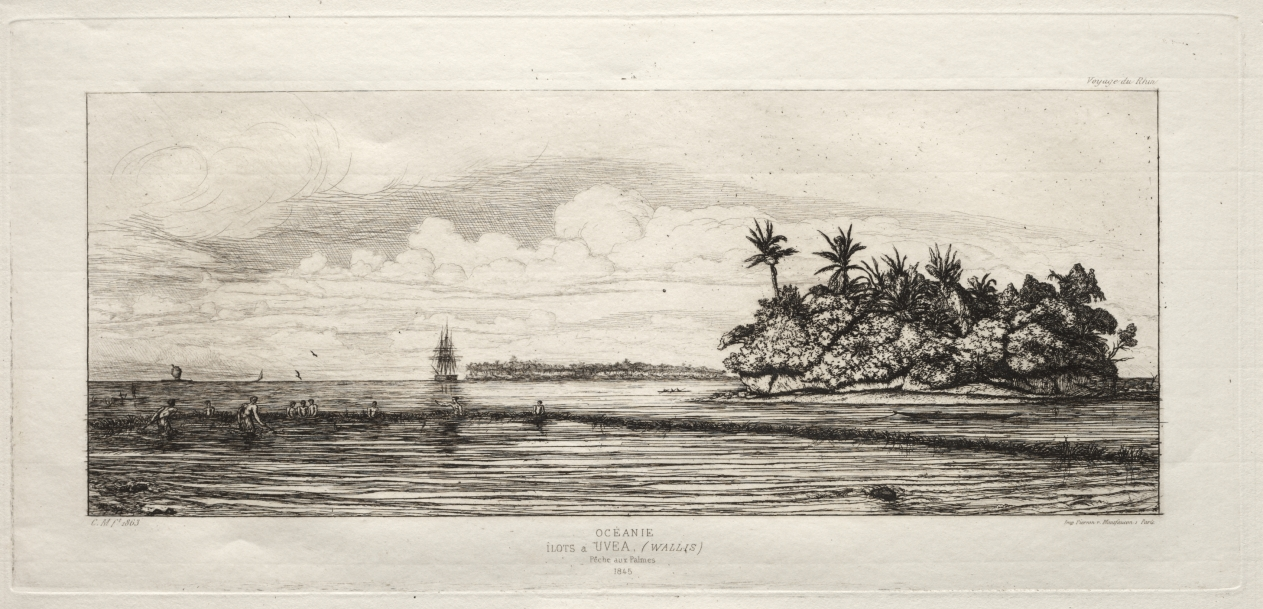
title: Oceanie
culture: France, 19th century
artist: Charles Meryon (French, 1821–1868)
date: 1845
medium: etching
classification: Print